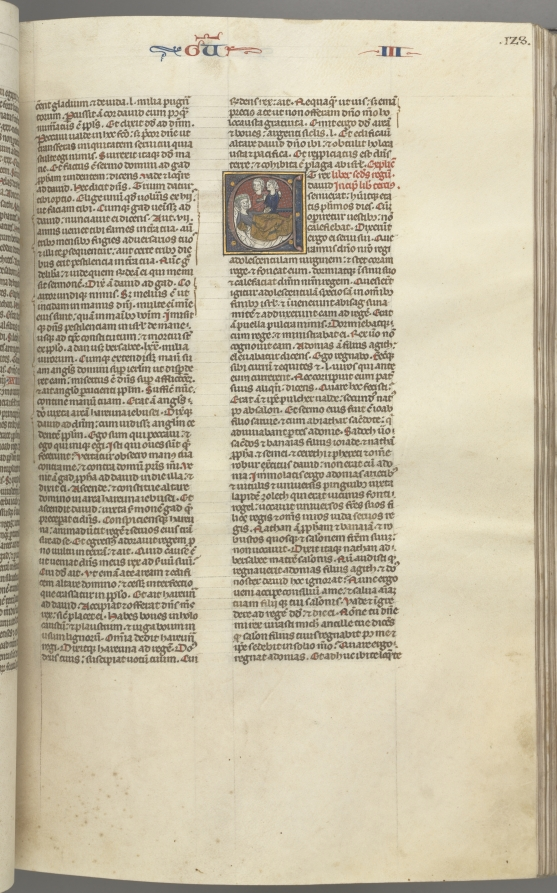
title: Fol. 123r, Kings III, historiated initial E, an attendant bringing Abishag to David who lies on a bed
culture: Southern France, Toulouse(?), 13th century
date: c. 1275–1300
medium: ink, tempera and gold on vellum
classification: Bound Volume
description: Biblical manuscripts were highly prized and important possessions of churches, monasteries, cathedral schools, and universities throughout medieval Europe. The biblical texts were known as the vulgate, the translations made by Saint Jerome in the fourth century from Hebrew and Greek into Latin, which became the definitive and official Latin version of the Roman Church. In the 13th century, the bible was, for the first time, produced as a single volume with an officially sanctioned sequence to its books and chapters as illustrated by this example. The very extensive decoration of this bible is arranged hierarchically to indicate the relative importance of the various texts so that full or almost full-page initials mark the openings of the first prologue, Genesis, and the first Gospel; historiated initials mark the beginning of each book and illuminated initials mark the Prologues.